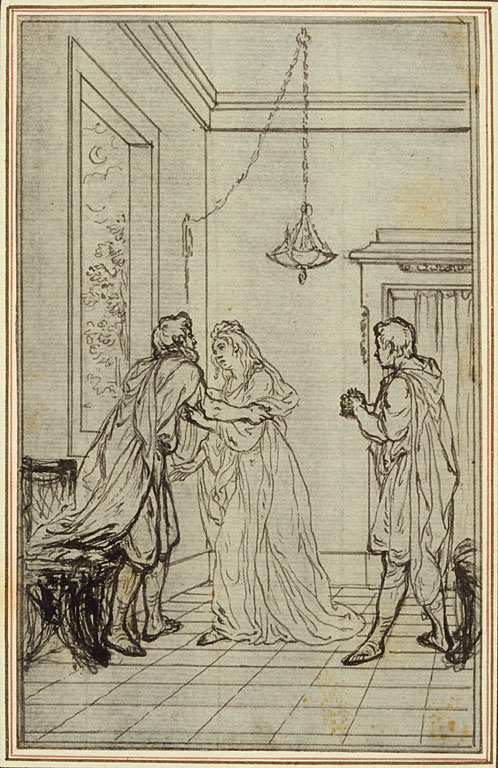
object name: Drawing and Watercolor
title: Study for Lucain's "La Pharsale", Canto II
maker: Hubert François Gravelot (French, 1699-1773)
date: c. 1766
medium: Pen and black ink, over touches of graphite, on gray laid paper, incised for transfer and perimeter mounted on cream laid paper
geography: France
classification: pen and ink drawings; drawings (visual works); prints and drawing